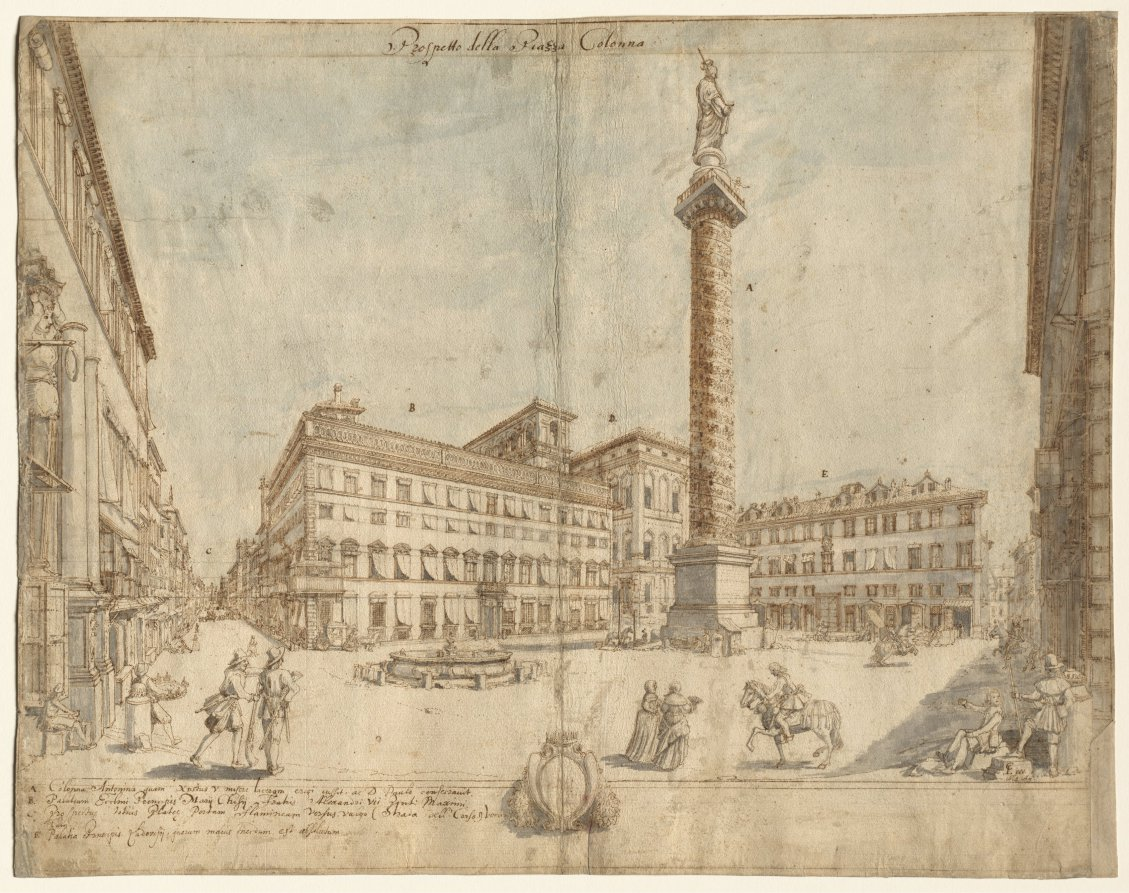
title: Eighteen Views of Rome: The Piazza Colonna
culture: Flanders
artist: Lievin Cruyl (Flemish, c. 1640-c. 1720)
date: 1664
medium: pen and brown ink and brush and gray and blue wash over stylus and graphite; framing lines in brown ink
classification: Drawing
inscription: signed, lower right, in brown ink: [artist monogram: LC] inv. / 1664 Ag. ; by artist, upper center, in brown ink: Prospetto della Piazza Colonna ; by artist, throughout composition, in brown ink: [the letters A-E] ; by artist, lower left, in brown ink: A. Colonna Antonina, quam Xystus V. misere laceram erigi ussit, ac D Paulo conservavit. / B. Palatium Ecclmi Principis Marij Chisij Fratris Alexandri vii Pont: Maximi. / C Prospectus totius Plateæ Portam Flamineam versus.vulgo (Strada dell'Corso) Voca= / tam. / E Palatia Principis Ludovisij, quorum maius necdum est absolutum. ; VERSO, upper left, in brown ink?: 5 upper left, in graphite: 545 ; ON STRIPS OF PAPER MOUNTED TO VERSO, lower right, in graphite: Albertina 20968 ; lower right, in graphite: #2